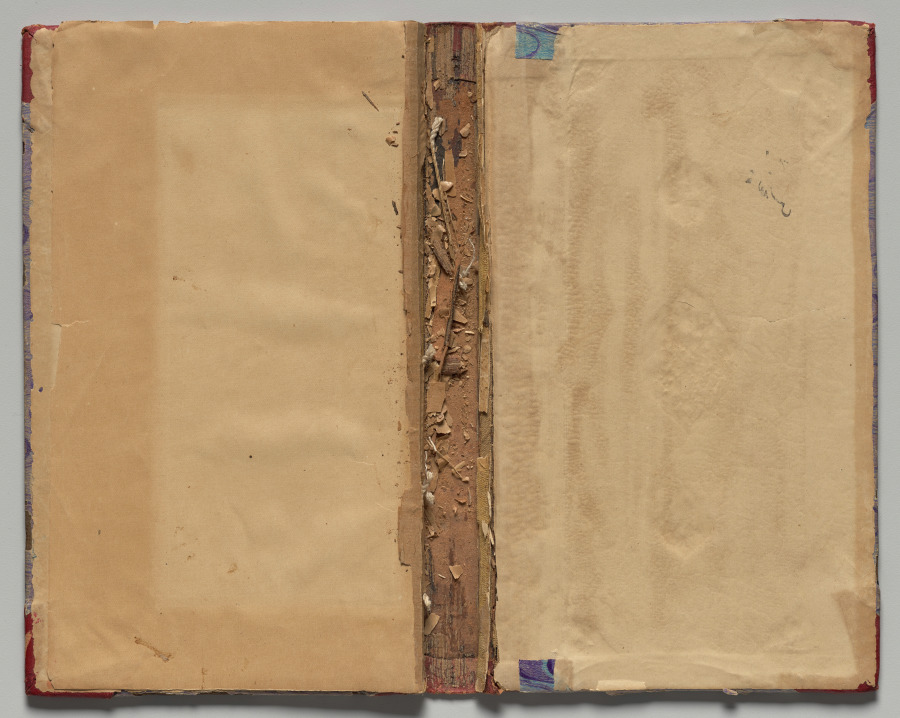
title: Mirror of Holiness (Mir’at al-quds) of Father Jerome Xavier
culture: Mughal India, Allahabad, made for Prince Salim (1569–1627)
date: 1602–4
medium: 24 full size illustrations with 160 folios of text; gum tempera, ink, and gold on paper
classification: Manuscript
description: Father Jerome Xavier (1549–1617) of the Society of Jesus, also known as the Jesuit order of Catholic priests, spent 19 years as a guest at the Mughal court from 1595 until 1614. While in residence he learned the Persian language so that he could engage in theological discussions in the courts of Akbar and his successor, Jahangir. When Akbar requested a biography of Jesus, Father Jerome wrote the Mir’at al-quds in Persian prose. This text relates his version of the life and miracles of Jesus based on a number of canonical and apocryphal sources. He emphasized aspects of the life of Jesus that he thought would appeal to Akbar in the hopes of winning the emperor’s conversion to Christianity.